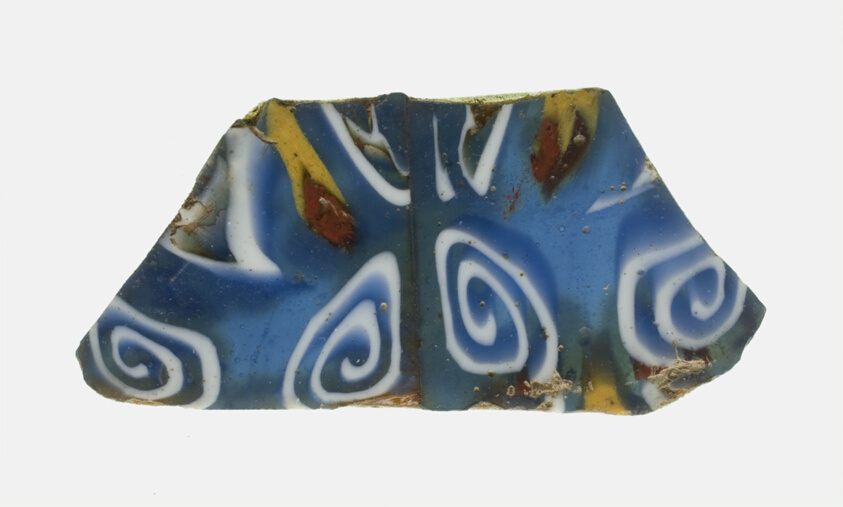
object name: Decorative Arts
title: Bowl Fragment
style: roman (ancient, style or period), ancient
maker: Roman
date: 1st century BCE-1st century CE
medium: Glass, mosaic glass technique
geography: Roman Empire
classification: fragment; bowl; decorative arts